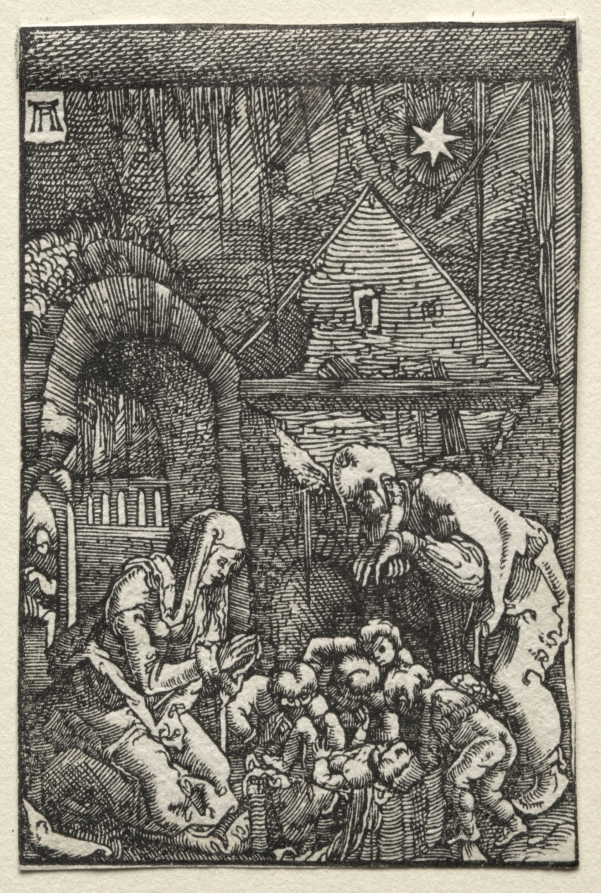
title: The Fall and Redemption of Man: The Nativity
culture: Germany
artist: Albrecht Altdorfer (German, c. 1480–1538)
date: c. 1515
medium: woodcut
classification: Print